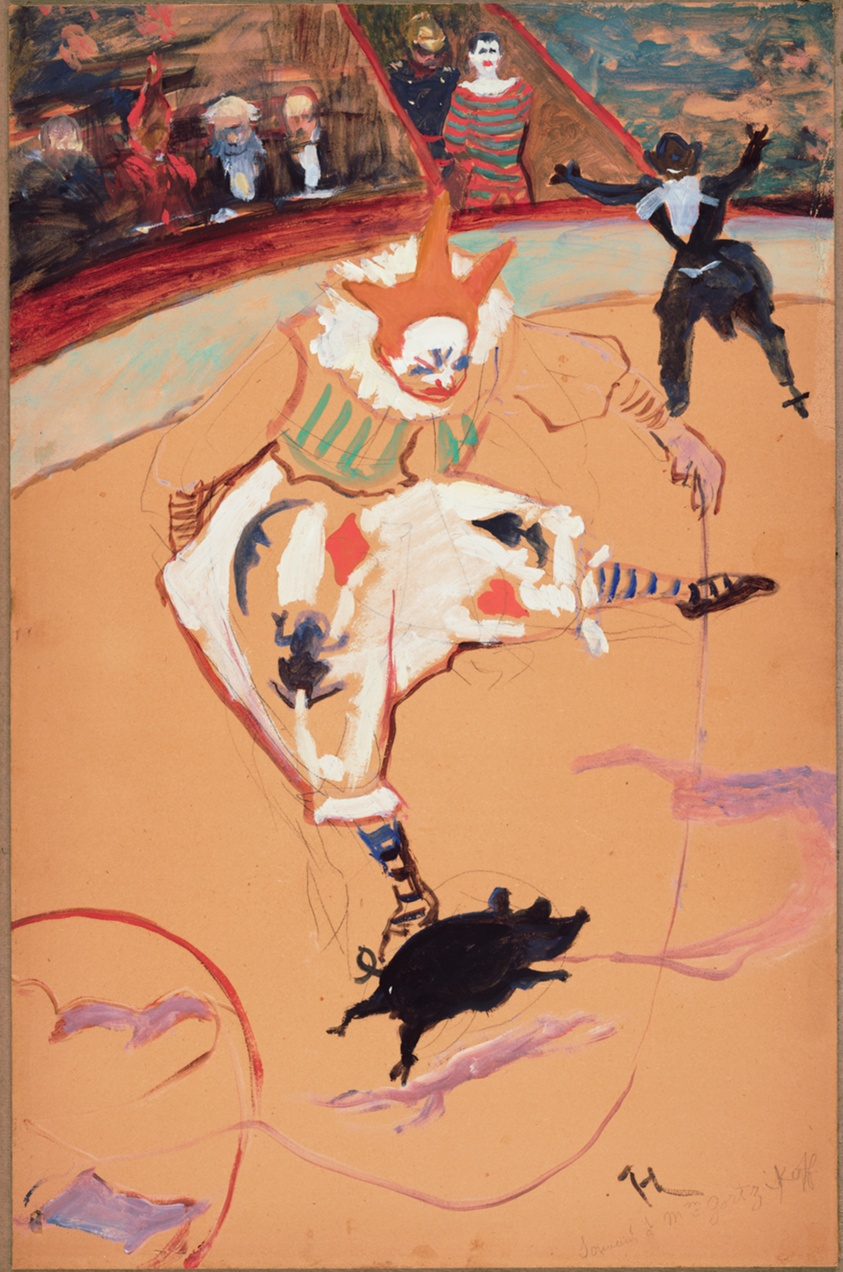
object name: Drawing and Watercolor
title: At the Circus Fernando: Medrano with a Piglet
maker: Henri de Toulouse-Lautrec (French, 1864-1901)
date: c. 1889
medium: Oil on paper laid down on board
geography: France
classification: drawings (visual works); prints and drawing